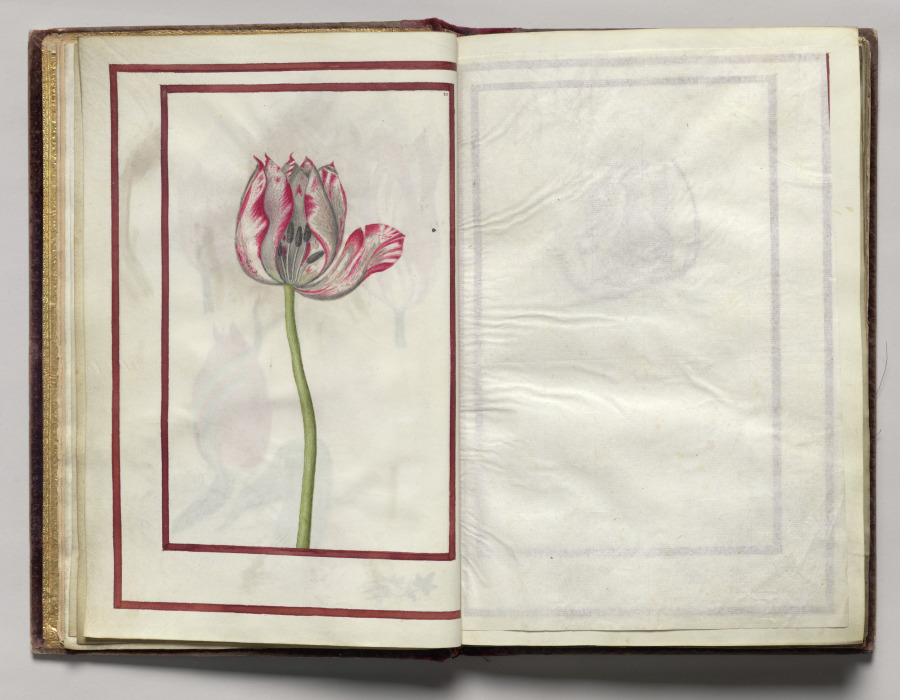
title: Tulip Section, folio 5 (verso), from Florilegium (A Book of Flower Studies)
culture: France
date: 1608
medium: watercolor, ink, silver, and gold over occasional traces of pencil, on vellum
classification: Bound Volume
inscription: Dated: Poitiers 1608 (on frontispiece) Signed: On frontispiece in black ink, lower right: Van Kuyk Notation on drawing: Frontispiece: in pencil, lower margin: * élève de Van Kessel, peintre flammand (* in pencil also appears in front of Van Kuyk's name).